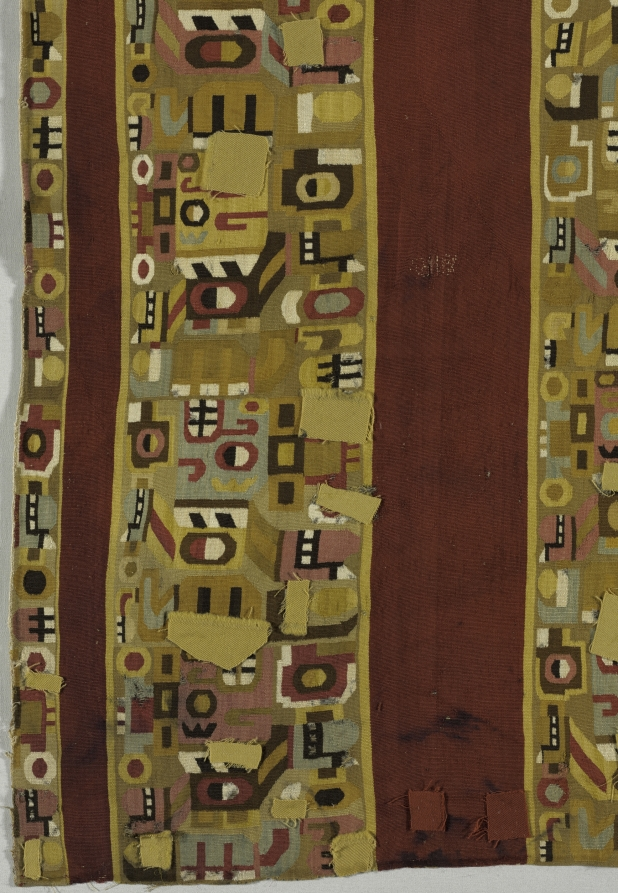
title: Tunic with Sacrificer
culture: South America, Peru, Central Andes, Middle Horizon, Wari people, 7th-11th century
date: 600–1000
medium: camelid-fiber, cotton; tapestry weave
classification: Textile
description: An extremely abstract supernatural sacrifice repeats in different colors and orientations across the body of this tunic, which was shortened on one side in antiquity. Look for the toothy black-and-white mouth in the sacrificer's upward-gazing head; other facial features include a button nose and a vertically divided eye. The figure holds the L-shaped haft of an axe behind its back and, at the front of its body, a short staff with a severed, upside-down human head on the top.